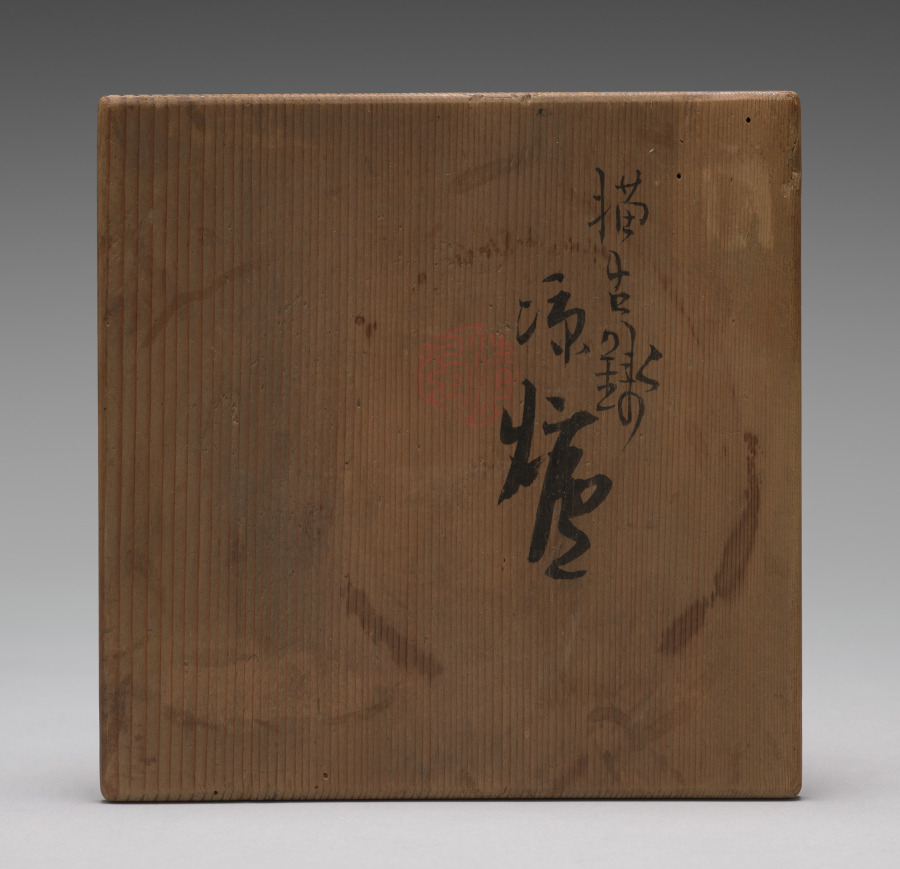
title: Brazier with Coins Motif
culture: Japan, Meiji period (1868–1912)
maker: Seifū Yohei III (Japanese, 1851–1914)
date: 1893–1914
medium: Stoneware with underglaze iron oxide designs and crackling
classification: Ceramic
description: Tall pottery braziers called ryōro are often used to heat the water for the tea served at sencha gatherings. This one sits on three sturdy legs, one of which bears the artist’s seal on its face. A horizontal rectilinear opening above this leg allows air to circulate into the lower part of the brazier. The top part is outfitted with three prongs onto which the kettle can be lowered; below them is a basin, perforated with circular holes, that holds the charcoal fuel. The brazier is decorated under the crackled transparent glaze with a design of old coins in iron oxide. The motif is cleverly chosen, for most older coins are round with a central hole, often square, which echoes the cylindrical form of the brazier with its rectilinear “wind gate,” or fūmon.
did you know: One coin is painted with the Japanese god of wealth, Daikokuten, standing upon two bales of rice.